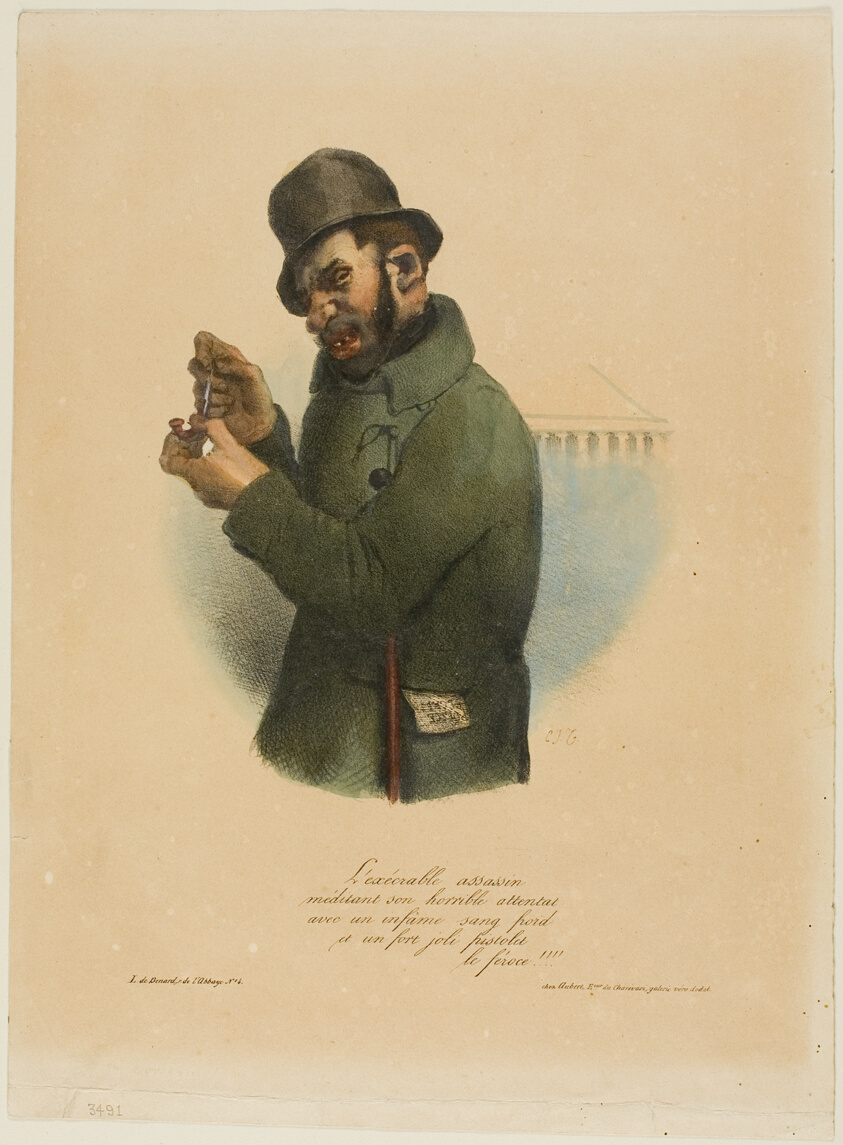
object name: Print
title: The Execrable Assassin Contemplates his Horrible Assault...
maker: Charles J. Traviès (French, 1804-1859); published by chez Aubert (French, 19th century); printed by Bénard (French, 19th century)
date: 1832–59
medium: Lithograph in black, with hand-coloring, on tan wove paper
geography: France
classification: lithograph; print; prints and drawing